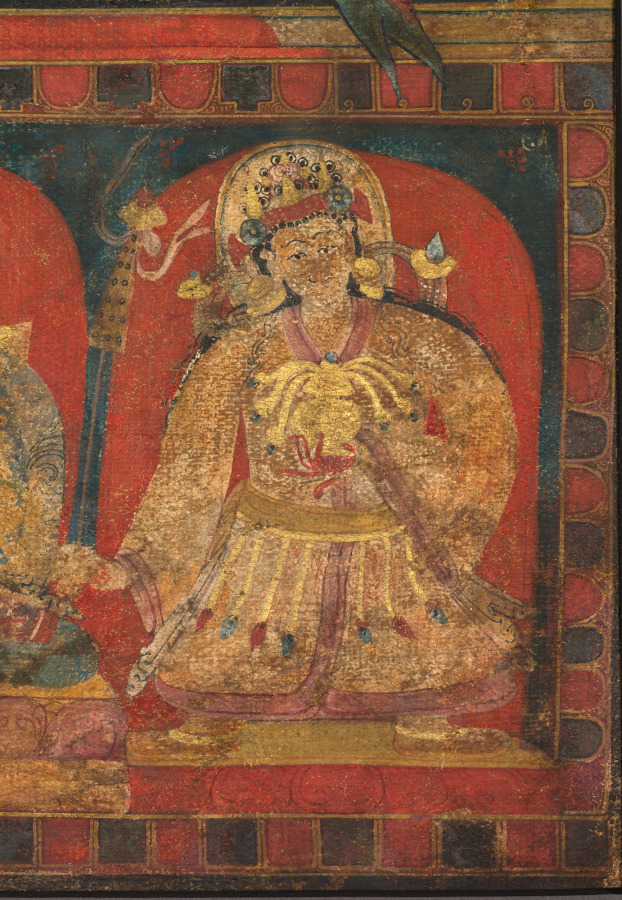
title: Tantric Buddha Vairochana as Vajrasattva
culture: Central Tibet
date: c. 1150–1200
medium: gum tempera, ink, and gold on cloth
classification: Painting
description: The seated Buddha dominating the composition is identified as Vairochana because of his hand gesture, the mudra communicating supreme enlightenment in which the index finger of one hand is grasped by the fingers of the opposite hand. His golden color and the tiny vajra—a six-pronged ritual object representing a thunderbolt—balanced on top of his finger suggest that he is in the guise of Vajrasattva, the summation of all enlightened beings. In his crown is the image of a monk, who is probably the guru of the donor, the small monastic figure at the lower right next to the lotus pedestal.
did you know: A mantra written behind the figures invokes their living presence in the thangka painting.